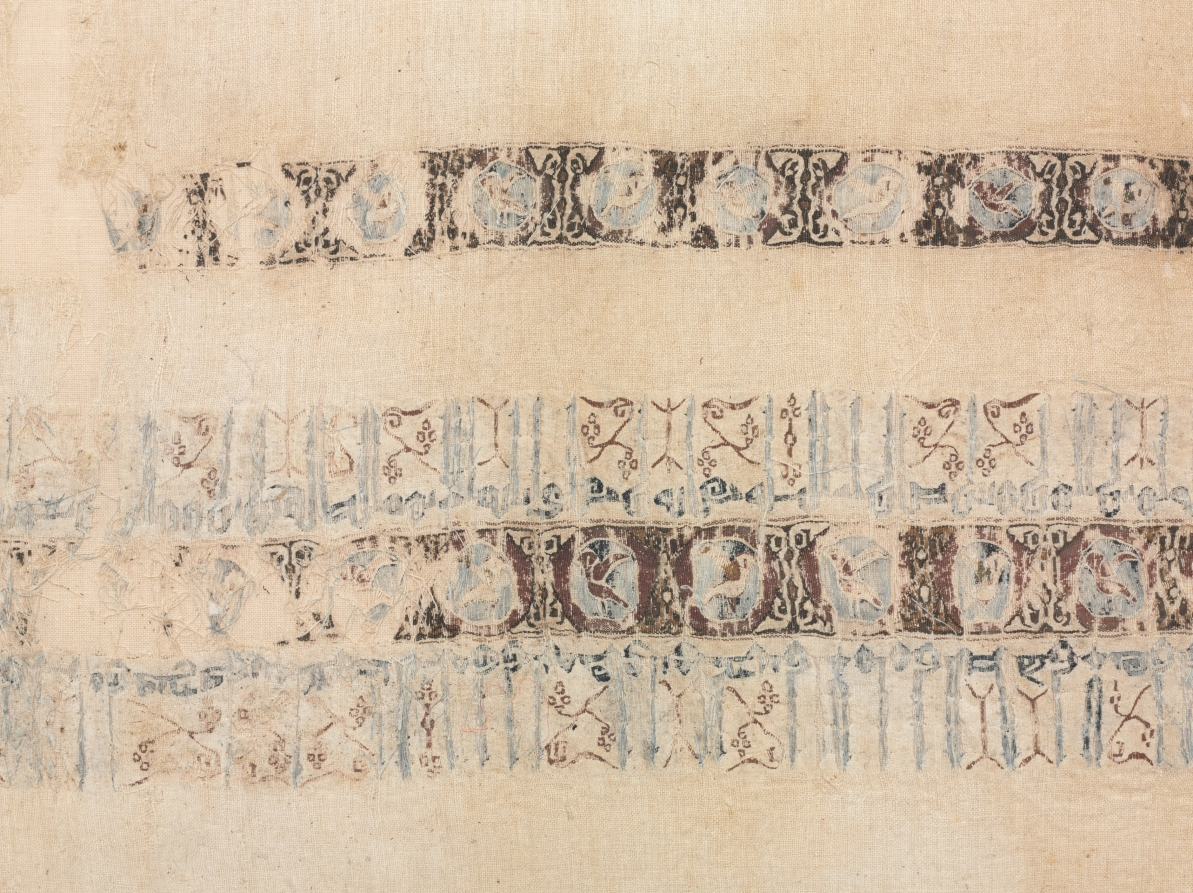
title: Fragment of a Tiraz, Probably Inset from a Sleeve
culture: Egypt, Fatimid period, Caliphate of al-Zahir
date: 1027–36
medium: tabby ground with inwoven tapestry ornament; linen and silk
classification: Textile